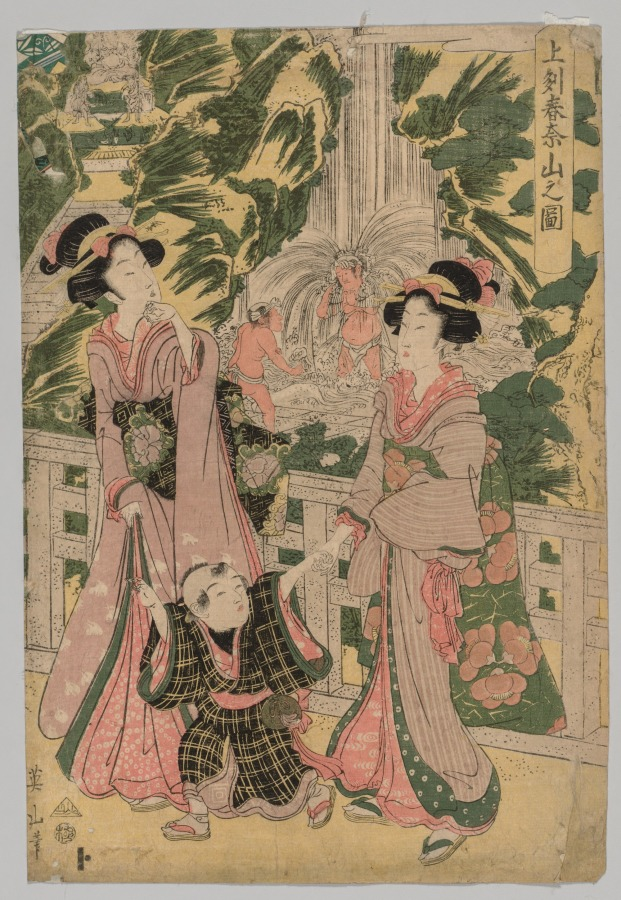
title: Mount Haruna in Kozuke Province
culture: Japan, Edo period (1615–1868)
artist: Kikukawa Eizan (Japanese, 1787–1867)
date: c. 1830s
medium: color woodblock print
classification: Print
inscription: Signature: Yeizan fude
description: This print is the right-hand sheet from a triptych depicting a famous Buddhist pilgrimage site in what is now Gunma prefecture. The women in the foreground observe men undergoing ritual purification by standing under a sacred waterfall. The full composition showed eight women and a child traversing a bridge before a panorama of the religious site.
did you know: The Buddhist sculptures in the upper left corner of this print represent Fudo Myoo flanked by two child deities called Seitaka and Kongara.